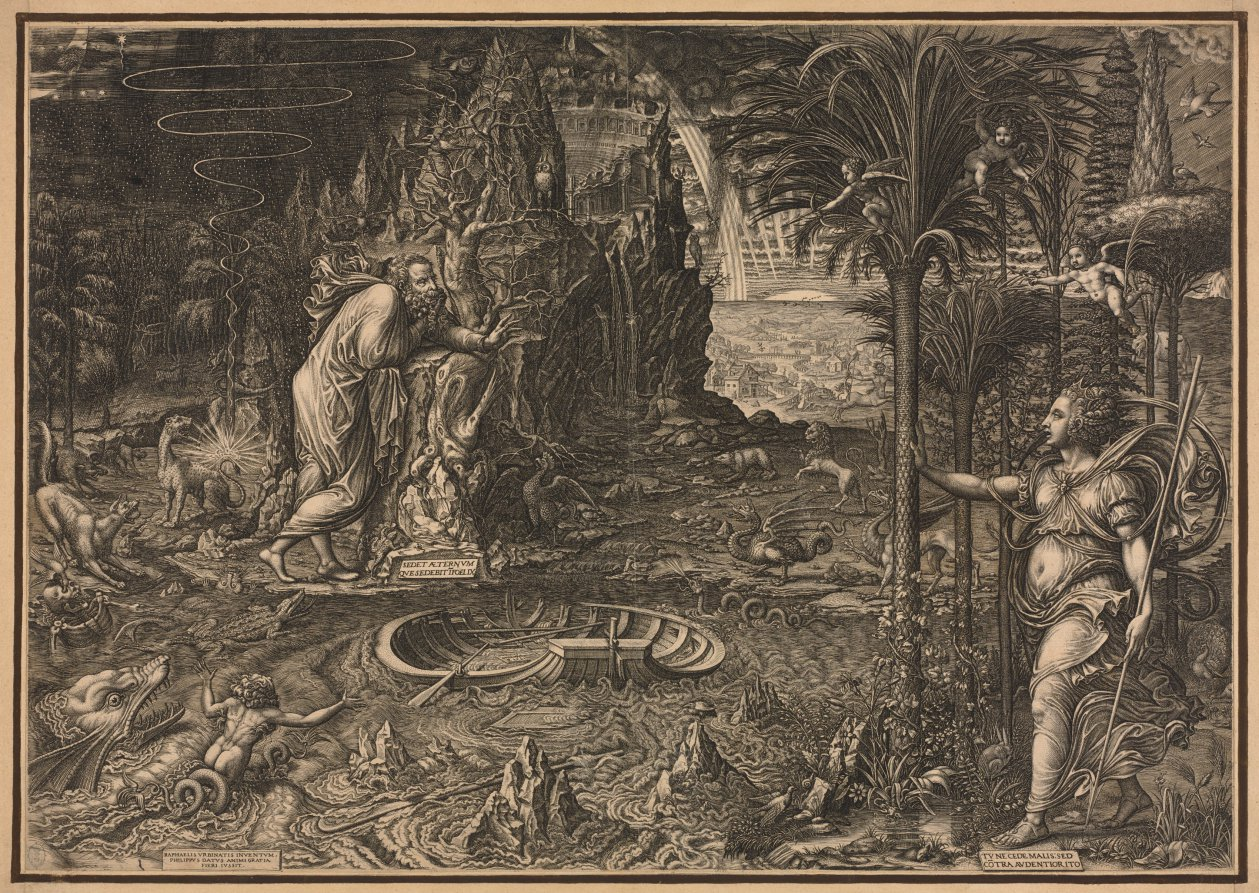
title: Allegory of Life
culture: Italy, 16th century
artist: Giorgio Ghisi (Italian, 1520–1582)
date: 1561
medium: engraving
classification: Print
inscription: center, in plate: SEDET ÆTERNVM / QVE SEDEBIT IFOELIX [line over the 'I' beginning IFOELIX] ; lower left, in plate: RAPHAELIS VRBINATIS INVENTVM. / PHILIPPVS DATVS ANIMI GRATIA / FIERI IVSSIT. ; lower center, on tablet in boat, in plate: GEORGIVS / GHISI MAT. / .F 1.5.6.1. [line over 'A'] ; lower right, in plate: TV NE CEDE MALIS : SED / COTRA AVDENTIOR ITO [line over 'O' in COTRA] ; VERSO, center, in pen and brown ink: [illegible word crossed out] ; lower right, in graphite: 7073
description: This engraving presents a complex allegory whose complete meaning remains unclear, although the plaques at the feet of the man and woman may provide one clue. The inscriptions come from the sixth book of Virgil’s Aeneid: "He who sits unfortunate will sit forever," and "Do not yield to adversities, but go out to meet them bravely." The print’s details do not correspond directly to any episode from Virgil, although book six, in which Aeneas descends into the underworld, is an allegory of human life. A similar theme could be suggested here, communicating an essentially hopeful message of overcoming tribulation.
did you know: Ghisi was trained in the creation of luxury metalwork, specifically armor, informing his highly skilled and complex engraving of the copperplate used to make this print.